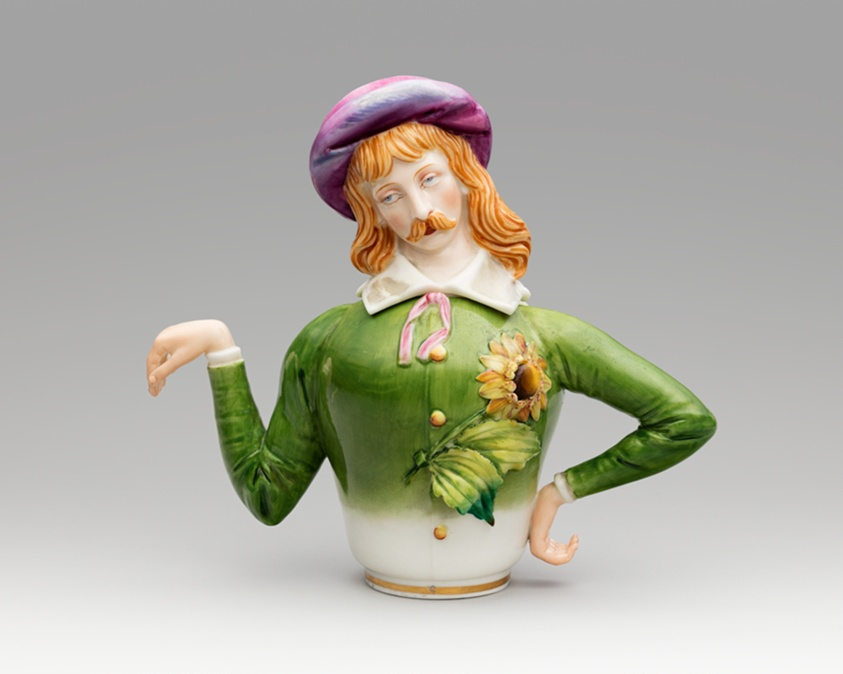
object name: Ceramics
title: Teapot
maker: Designed by James Hadley; English, 1837–1903; Made by the Royal Worcester Porcelain Company; Worcester, England, reorganized 1862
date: 1882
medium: Glazed and enameled Parian ware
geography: England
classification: teapot; ceramics